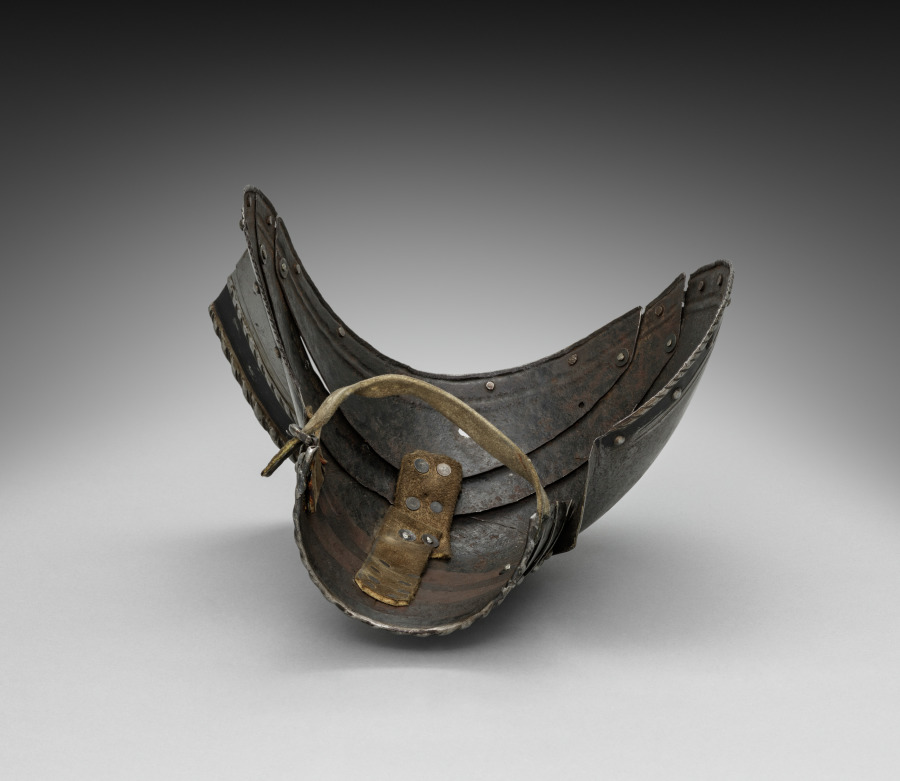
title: Right Pauldron with Guard Brace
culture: Germany, 19th century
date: 1801–1900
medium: steel with black paint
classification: Arms and Armor